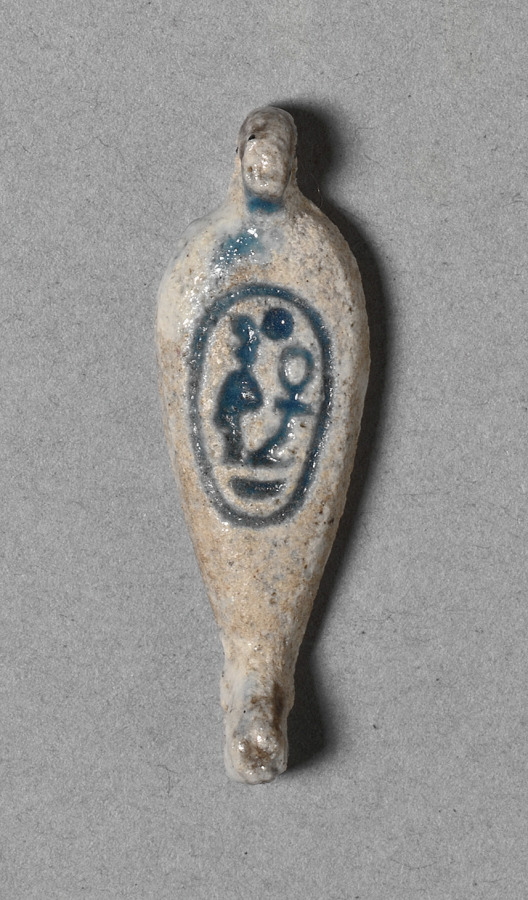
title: Petal-Shaped Bead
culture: Egypt, New Kingdom (1540–1069 BCE), Dynasty 18, reign of Amenhotep III (1390–1352 BCE)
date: c. 1391–1353 BCE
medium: faience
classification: Jewelry